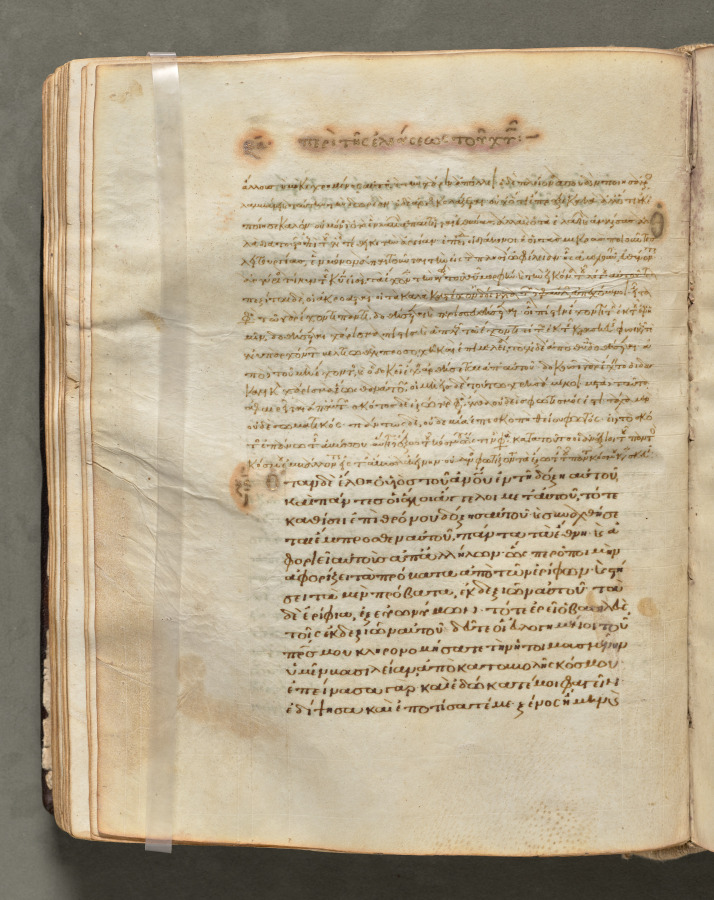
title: Text, folio 112 (verso), from a Gospel Book with Commentaries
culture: Byzantium, Constantinople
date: c. 1000–1100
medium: ink, tempera, and gold on vellum; leather binding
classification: Bound Volume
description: Each of the four gospels in this book opens on a page with brilliantly illuminated borders depicting the author of the text as well as birds-principally peacocks, symbols of the immortality of the soul-and fountains, representing the fountain of life and the salvation of the soul. This volume consists of 428 leaves with texts in Greek. Its level of sophistication suggests that it was probably written and decorated in a monastery in Constantinople.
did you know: Gospel Books were carried in procession through Byzantine churches.